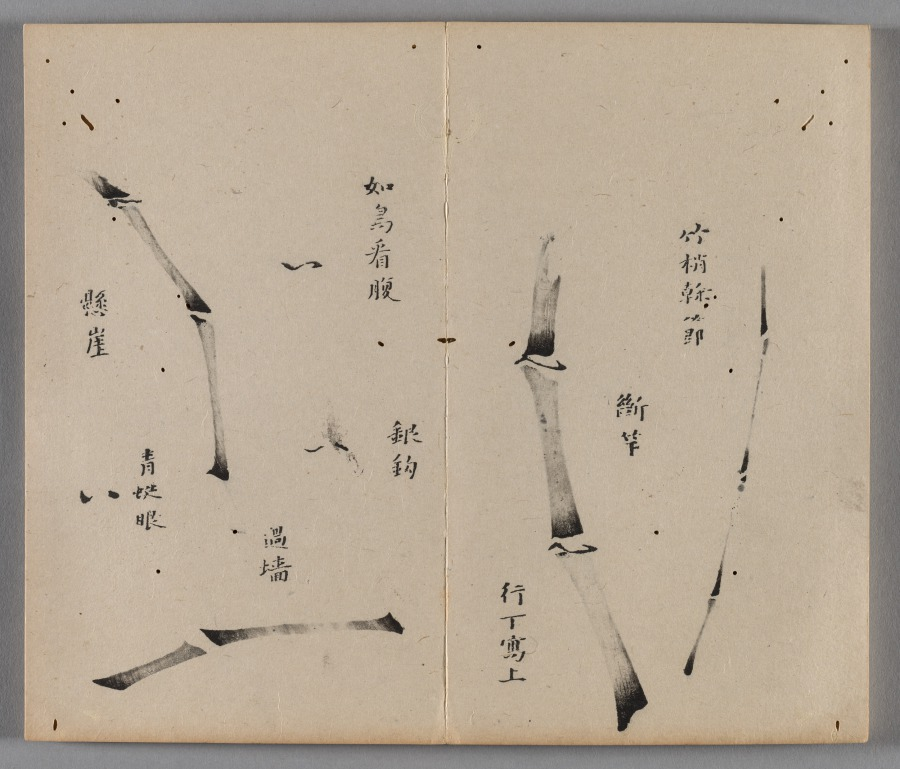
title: Ten Bamboo Studio Painting and Calligraphy Handbook (Shizhuzhai shuhua pu): Bamboo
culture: China, Qing dynasty (1644-1911)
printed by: Hu Zhengyan (Chinese, c. 1584–1674)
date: 1633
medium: Woodblock-printed book; ink and colors on paper; first edition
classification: Print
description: Color printing reached a level of perfection in the early 1600s, as seen in this Ten Bamboo Studio Collection of Calligraphy and Painting and the Mustard Seed Garden Manual of Painting (printed 1679 and 1701). The painterly quality, precision in registering (aligning) the woodblocks, and harmonious colors made them the most successful color print editions in Chinese history. Both editions were printed and compiled in Nanjing, spread nationwide, and had a great impact on the arts in Japan and Korea.